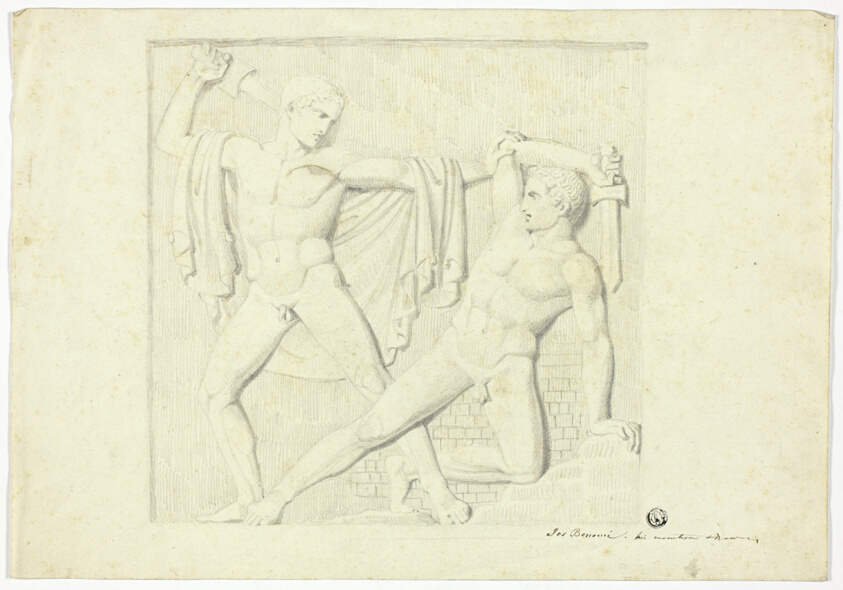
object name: Drawing and Watercolor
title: Classical Relief with Two Fighting Male Nudes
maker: Joseph Bonomi, the Younger (English, 1796-1878); or Joseph Bonomi, the Elder (English, born Italy, 1739-1808)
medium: Graphite on ivory laid paper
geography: England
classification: graphite; drawings (visual works); prints and drawing; paper